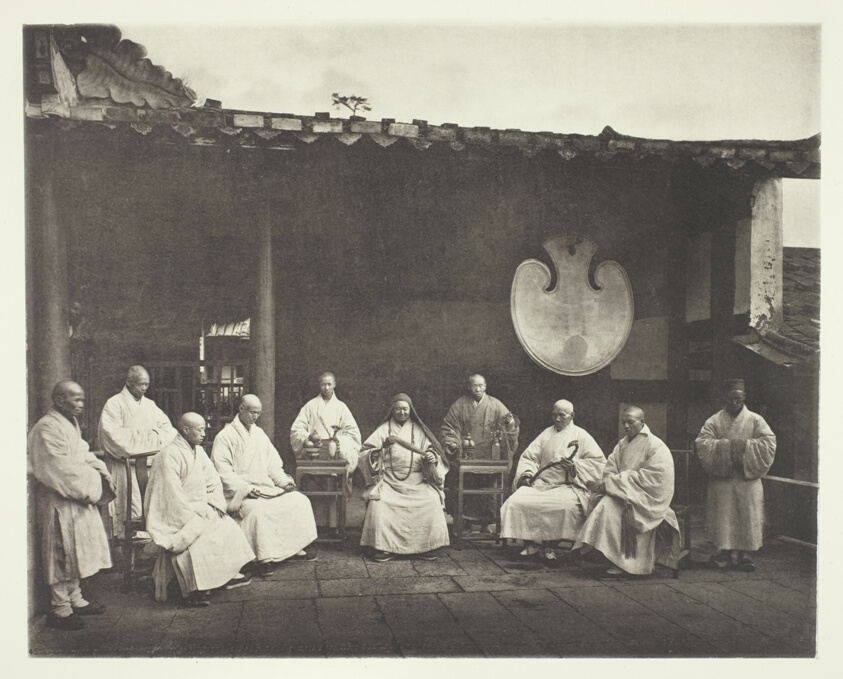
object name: Photograph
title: The Abbot and Monks of Kushan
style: 19th century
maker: John Thomson (Scottish, 1837–1921)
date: c. 1868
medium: Collotype, pl. XVIII from the album "Illustrations of China and its People, Volume II" (1873)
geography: Scotland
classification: photography; photograph